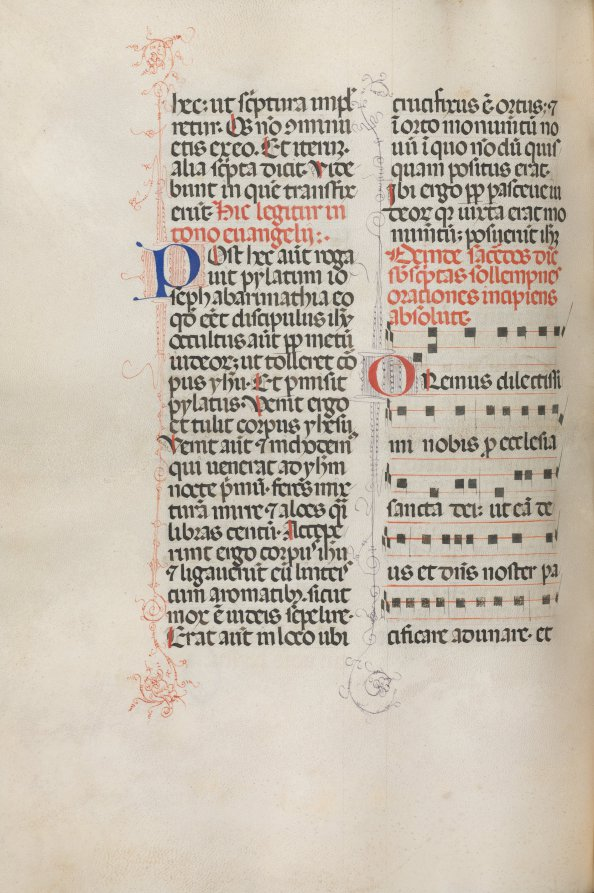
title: Missale: Fol. 145v: Music for various prayers "Oremus dilectissimi..." and "Omnipotens sempiterne Deus"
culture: Italy, Perugia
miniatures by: Bartolommeo Caporali (Italian, c. 1420–1503)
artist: assisted by Giapeco Caporali (Italian, d. 1478)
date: 1469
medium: ink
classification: Bound Volume